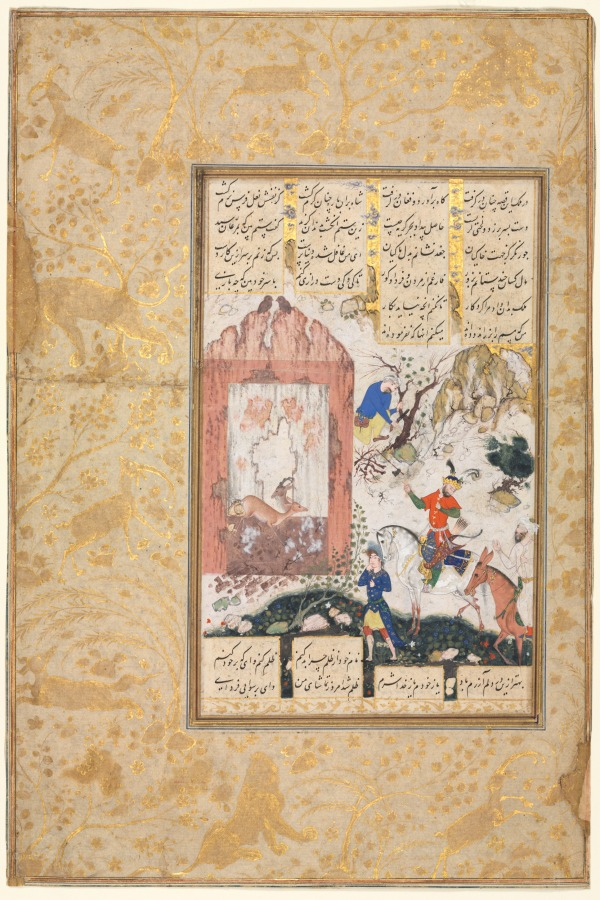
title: Nushirwan Listens to the Owls (recto); the Story of Nushirwan and his Minister, "The Third Discourse on Diverse Events and Disorder in Life" (verso) from a Khamsa (Quintet) of Nizami (1141–1209)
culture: Iran, Qazvin, Safavid period (1501-1722)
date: 1555–65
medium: opaque watercolor, ink, and gold on paper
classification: Manuscript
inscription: script: Nasta'liq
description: This scene is from the Makhzan al-Ashrar, the first of the Quintet. Although more historically oriented than the following poems, it served more as a vehicle for moralizing tales than for historical events. In this scene Nushirwan asks the sage Buzurgmihr to explain what the owls perched on a ruined building are saying. He explains that one owl is offering the other as many ruined cities as he likes in exchange for his daughter's hand. He thus reproves Nushirwan for his love of conquest and war and the consequent destruction of many cities.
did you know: King Nushirwan is on a white horse, while his minister Buzurjmihr is riding a mule.